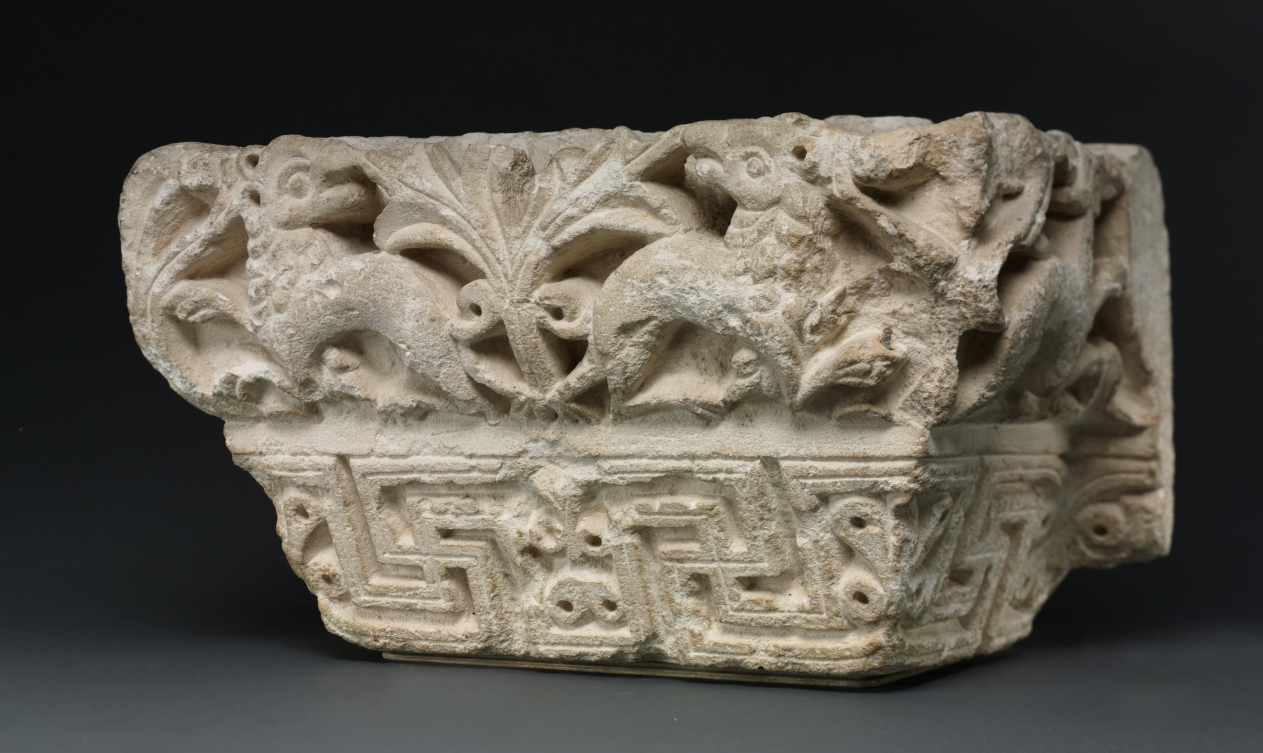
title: Engaged Capital with Animals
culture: Egypt, Coptic period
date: 400s - 500s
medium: limestone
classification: Sculpture